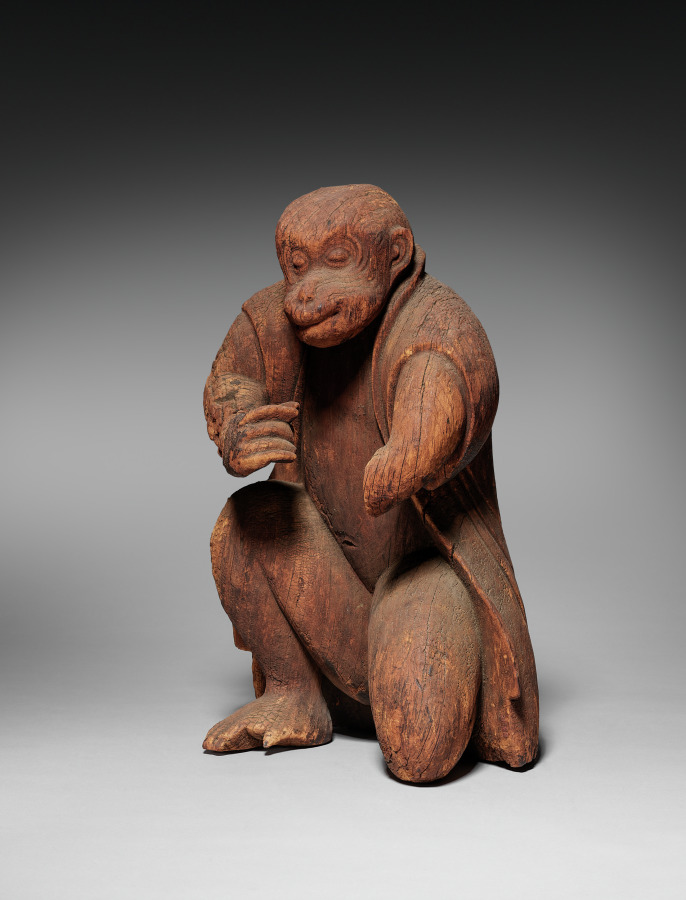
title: Monkey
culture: Japan, Edo period (1615–1868)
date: possibly 1700s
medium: wood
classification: Sculpture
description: Watching monkeys perform was once a popular form of street entertainment in Japan. Monkeys were outfitted with costumes and learned to perform dances and tricks. Monkeys also serve as the messengers of certain kami, or deities, and pairs of clothed monkey sculptures in wood or stone may be found on either side of the entrance of some jinja, or shrines dedicated to kami. This monkey has a jacket and may have once held bells and a fan. Unfortunately, its original identity and purpose have been lost.